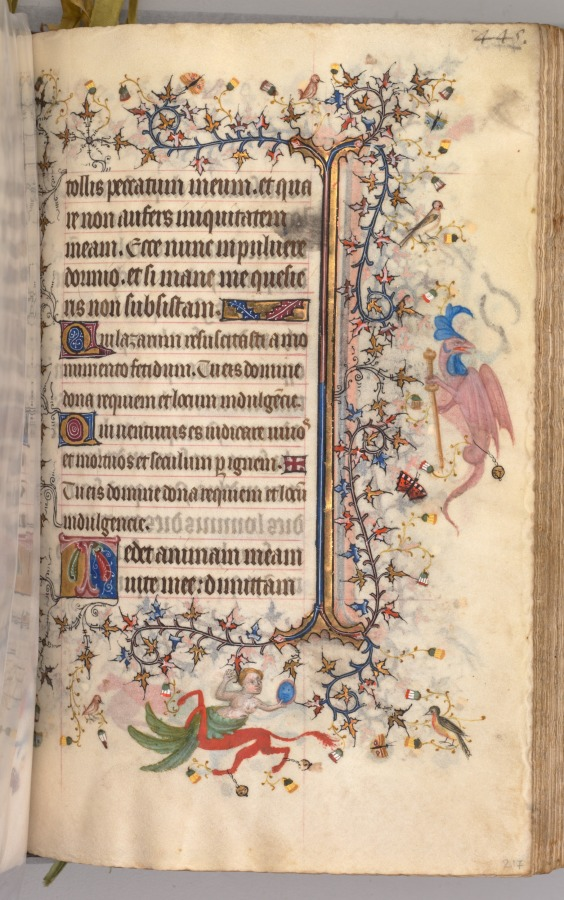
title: Hours of Charles the Noble, King of Navarre (1361-1425): fol. 217r, Text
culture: France, Paris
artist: Master of the Brussels Initials and Associates (French)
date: c. 1405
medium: ink, tempera, and gold on vellum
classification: Bound Volume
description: This precious volume was obviously highly prized by its owner, the French-born King of Navarre, who had his coat of arms painted on no less than twenty folios. Rather than directly commissioning this manuscript from a specific workshop, it seems that Charles the Noble acquired his book of hours -- perhaps ready-made for the luxury market -- while on a trip to Paris in 1404-05. A collaborative effort, six painting styles are evidenced within the pages of this codex, those of two Italians, two Frenchmen, and two Netherlanders. The painter who was responsible for the planning and decoration of the book, and who produced seventeen of the large miniatures, was a Bolognese artist known as the Master of the Brussels Initials. His principal assistant, responsible for most of the borders, was a Florentine who signed his name "Zecho" da Firenze on folio 208 verso.